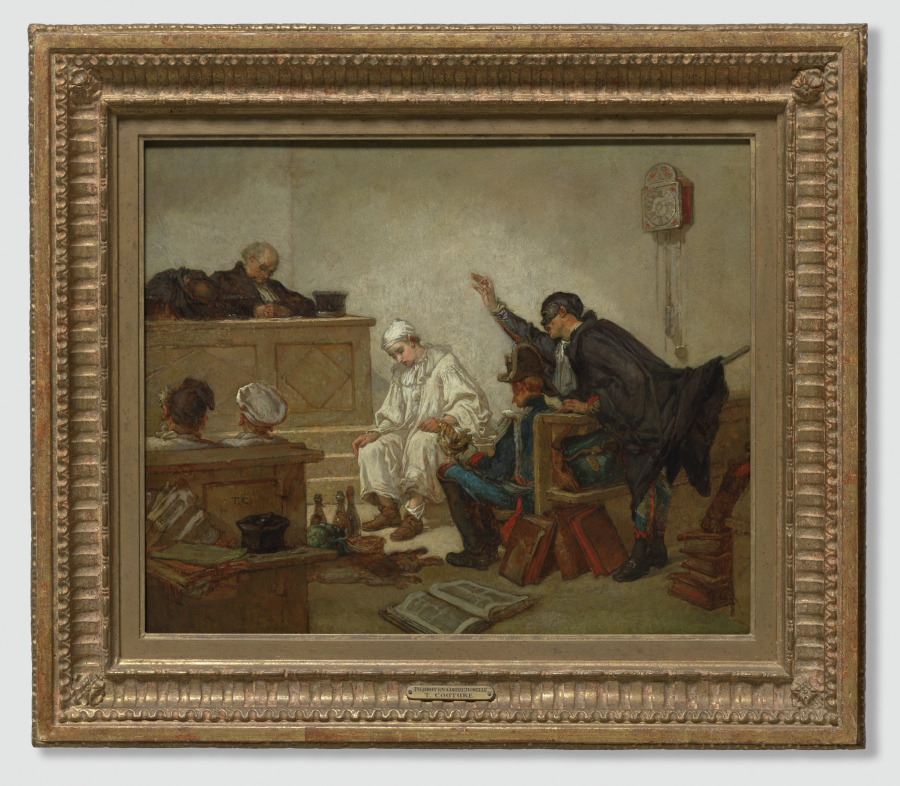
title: Pierrot in Criminal Court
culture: France, 19th century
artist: Thomas Couture (French, 1815–1879)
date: c. 1864–70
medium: oil on wood panel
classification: Painting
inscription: Signed left on the back of the bench: t.c.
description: In this painting, Couture used two famous masked characters, Pierrot and Harlequin, to satirize and critique the public and the judicial system of the 19th century. The pathetic Pierrot represents a lower-class fool on trial for stealing food from a restaurant. The stolen items are depicted lying on the courtroom floor as an indictment of his guilt. His accusers sit on the left, while Harlequin, his lawyer, argues theatrically for the defense. The artist's contempt for the legal profession and the court system is plain in the figures of the sleeping judges. A mid-19th-century observer may have sympathized with Pierrot, who for his own survival cunningly subverts authority in order to satisfy his needs.